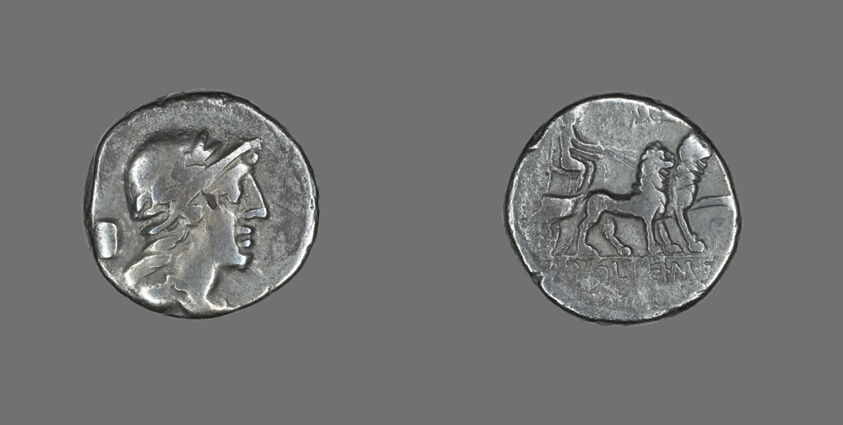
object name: Coin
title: Denarius (Coin) Depicting a Helmeted Head of Attis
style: roman (ancient, style or period), ancient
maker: Roman; Volteia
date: about 78 BCE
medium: Silver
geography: Roman Empire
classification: coin; ancient art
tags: Chariots